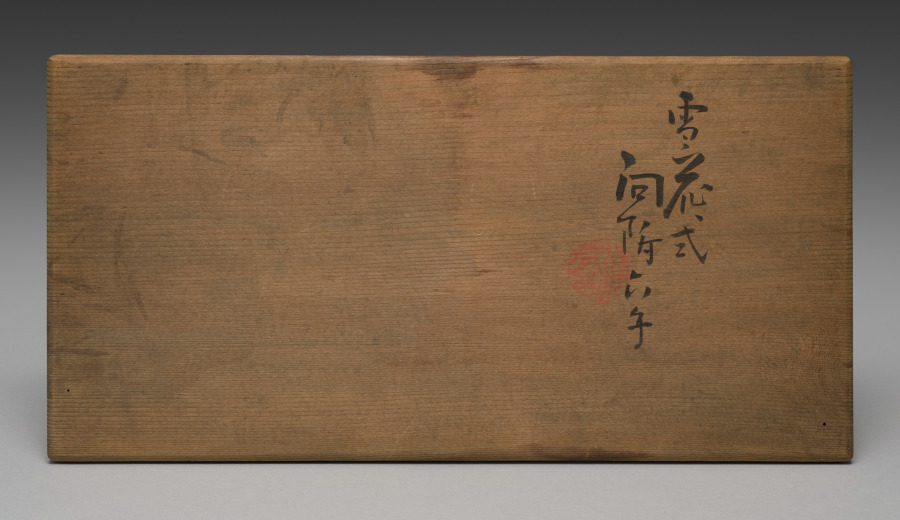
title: Snow-Flake Side Dishes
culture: Japan, Meiji period (1868–1912)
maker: Seifū Yohei III (Japanese, 1851–1914)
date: 1893–1914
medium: Set of six dishes; porcelain with lobed rims and pink glaze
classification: Ceramic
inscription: 清風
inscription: 帝室技芸員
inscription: 清風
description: According to the box lid, this set of 6 side dishes, or mukōzuke, are “snow-flower style” (sekkashiki), having mouths shaped like snowflakes. Their mouths, which have 6 lobes and scalloped edges, are traced with brown iron oxide at the rim. The outside of each bowl is glazed with a very bright pink over the basin and foot, and the inside is left white. From directly above, one sees a snowflake-like shape, and from the side, they seem to float above a rosy ground.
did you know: The box for this set of dishes has an inscription on the side noting that they were for a person with the family name Nakamoto.